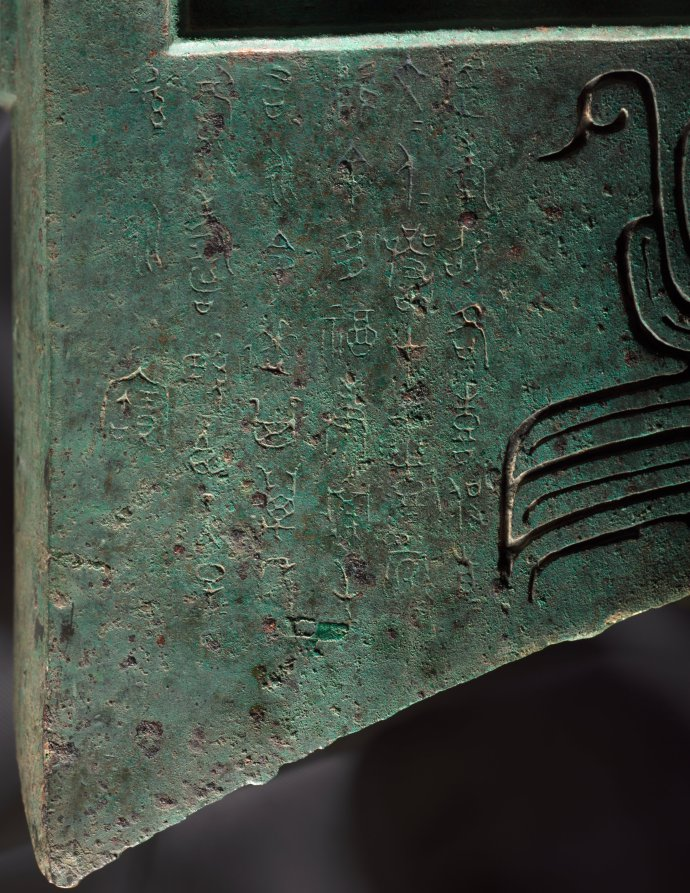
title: Bell (Lai Zhong)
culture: China, Shaanxi province, Meixian, Western Zhou dynasty (c. 1046–771 BCE)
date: c. 800–700 BCE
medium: bronze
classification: Metalwork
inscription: Lai proclaimed: "Great and illustrious was my august late father who made his heart clean following the disciplined virtue of his forefathers and dutifully served the past king. I, Lai, now succeed him in service and dare not fail. Respectfully, from dawn to dusk I will earnestly--even unto death--serve the Son of Heaven, taking as a model the obligation of my forefathers." I, Lai, was presented with many things. Then came the [king's] gracious command: "Manage the fisheries and forests of the realm." "I, Lai, dare to respond to the great, illustrious, sagely, and gracious favor of the Son of Heaven, extolling him and using this as cause to make for my august late father Gongshu a set of harmonized bells. Ding, dong, bing, bong, ding, dong, bing, bong. May they be used in acts of piety, reverently gladdening past luminaries. May the past luminaries who dwell on high help perpetuate this command, sending down upon me good fortune, tranquility, and purity. May I, Lai, live long in service to the Son of Heaven." May sons' sons and grandsons' grandsons forever treasure these [bells].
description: In ancient China, music and ritual had political significance and were linked inseparably to the power of states. During the Zhou dynasty, bronze bells were made in sets of eight to sixty bells. This bell is the second largest from a set of eight. This bell bears an inscription of 118 characters about its owner, Lai, and why it was cast. Lai's ancestors dutifully served the Western Zhou royal court, and he was granted a hereditary position by the "Son of Heaven" (the ruler). To express filial piety, Lai commissioned a set of bells as an offering to his father, Gongshu, in the hope that they would be forever treasured by future generations. This important inscription also provides an early example of Chinese calligraphy highlighting the purely abstract lines and construction of characters.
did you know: The technical sophistication of the unusual lens-shaped cavity allowed the bell to produce two different tones.